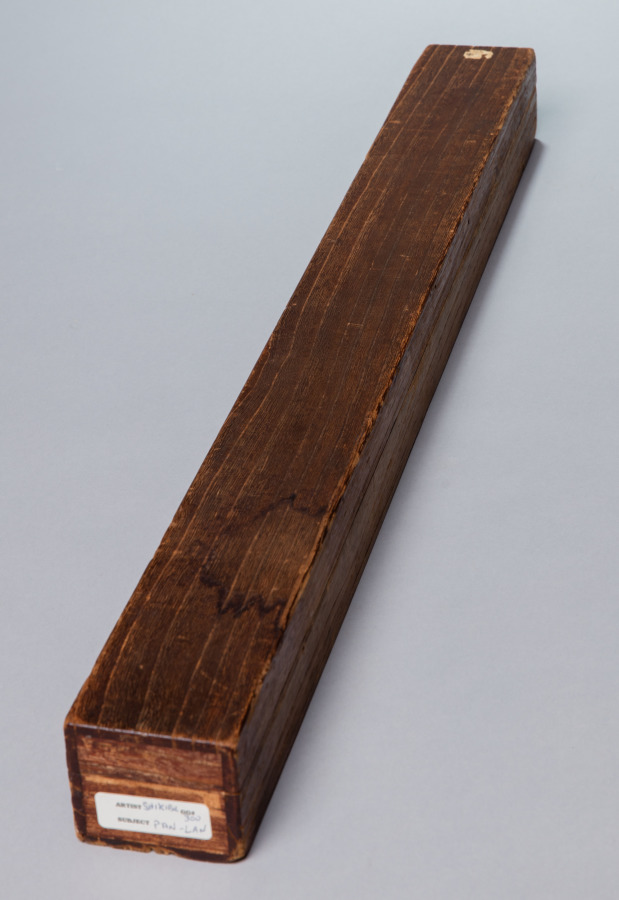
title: Pan Lang (Han Rō)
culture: Japan, Muromachi period (1392–1573)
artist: Shikibu Terutada (Japanese, active mid-1500s)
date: mid-1500s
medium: Fan-shaped painting mounted as hanging scroll; ink and gold on paper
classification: Painting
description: These three fan-shaped paintings, now mounted as individual hanging scrolls, were once part of a set of 20 mounted on a folding screen. They portray the Chinese subjects, from left to right, of the scholar-official Pan Lang, Hanshan reciting his poetry to Shide, and a duck in flight above reeds. Pan Lang grew so fond of the mountain in his place of exile that when he was ordered back to the capital, he rode backward on his donkey so he could see it until it receded into the distance. Hanshan and Shide worked in the kitchen of a Zen monastery, but were actually reincarnations of the bodhisattvas Manjushri and Samantabhadra. The combination of a mandarin duck and reeds may have signified a level of attainment in Chinese civil service exams. All three paintings bear the seal of the Kantobased artist Shikibu Terutada. Shikibu was familiar with Kano school painting, but he also modeled his early style after that of the prominent Kanto-based Kenkō Shōkei (active about 1470–after 1523).